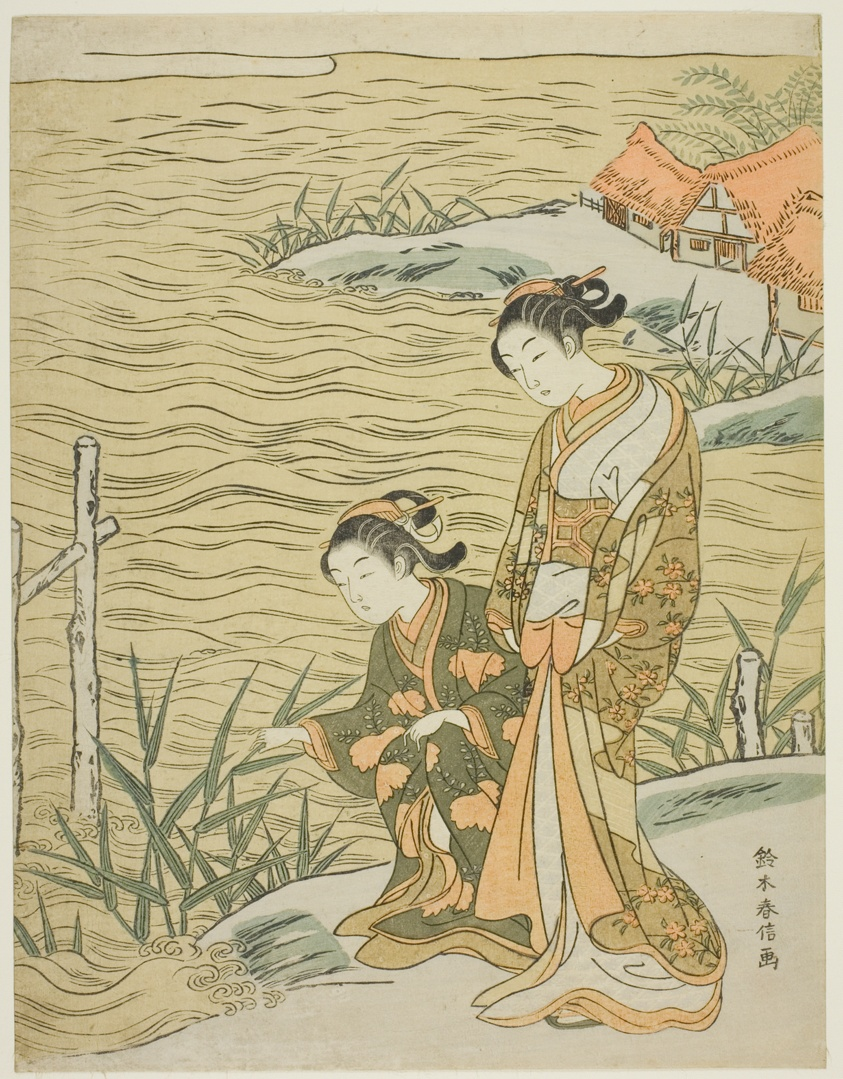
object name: Print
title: Two Women at the Waterside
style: Japanese (culture or style)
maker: Suzuki Harunobu 鈴木 春信; Japanese, 1725 (?)-1770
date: c. 1766/67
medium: Color woodblock print; chuban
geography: Japan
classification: woodblock print; print; asian art